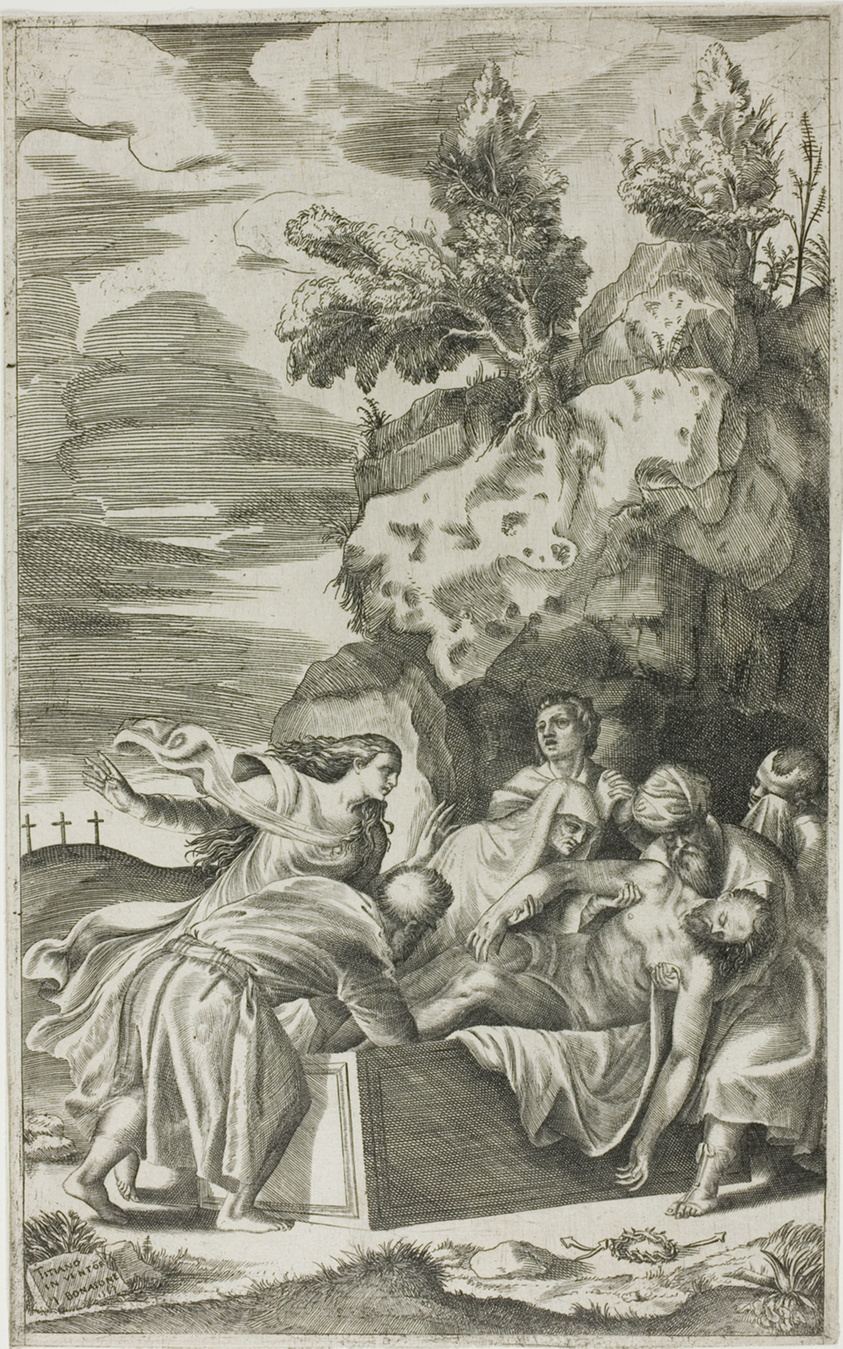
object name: Print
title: The Entombment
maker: Giulio Bonasone (Italian, c. 1510–after 1576); after Titian (Italian, c. 1488-1576)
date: 1563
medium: Engraving on paper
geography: Italy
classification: engraving; print; prints and drawing